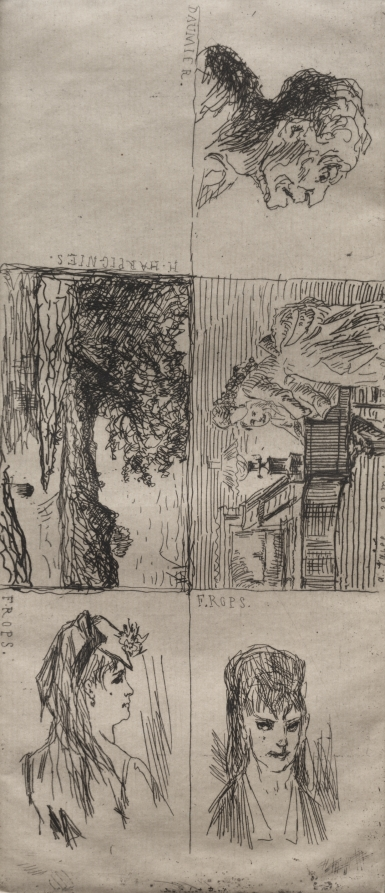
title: Five Studies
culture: France, 19th century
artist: Honoré Daumier (French, 1808–1879)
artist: Alfred Taiée (French, 1820–1881)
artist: Félicien Rops (Belgian, 1833–1898)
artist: Henri Joseph Harpignies (French, 1819–1916)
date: 1878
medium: etching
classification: Print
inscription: Verso, pencil: 5893 / Daumier, Rops, Harpignies / Taiée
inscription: On plate, upper left side of second space: DAUMIER. ; above third space: H. HARPIGNIES. ; right side of fourth space: A. Taileé. 29 mai 72. chez ch.de Beriot ; upper left corner of fifth space: F. ROPS; upper left corner of sixth: F. ROPS